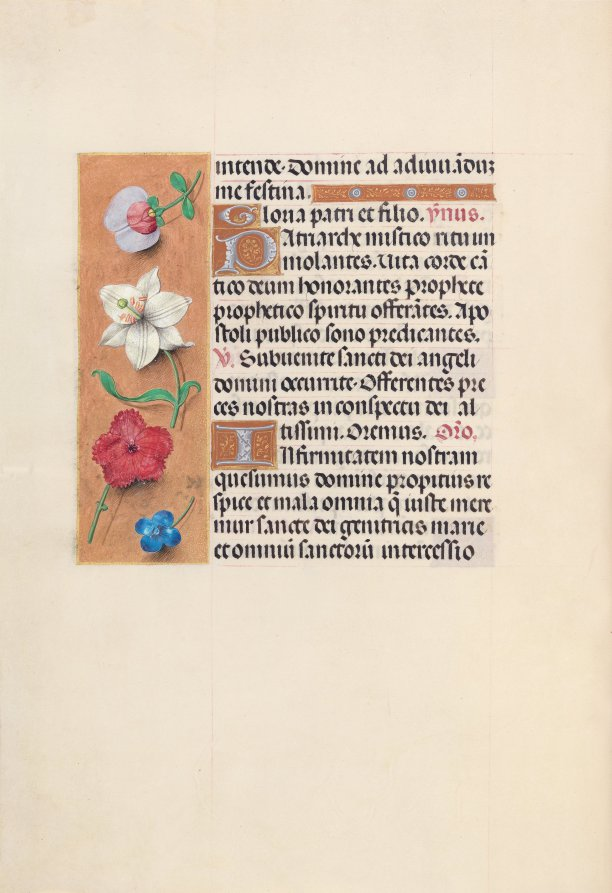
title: Hours of Queen Isabella the Catholic, Queen of Spain: Fol. 39v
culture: Flanders, Ghent and Bruges, late 15th century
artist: Master of the First Prayerbook of Maximillian (Flemish, c. 1444–1519)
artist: and Associates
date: c. 1500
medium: ink, tempera, and gold on vellum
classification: Bound Volume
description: This manuscript was illuminated by a circle of at least five highly organized manuscript painters active in the Flemish cities of Ghent and Bruges. The principal illuminator was Alexander Bening, who painted the majority of the book's miniatures. Manuscripts produced by this circle of artists are renowned for the decoration of their borders, which typically feature a rich variety of realistically-painted flowers, birds, and butterflies. This prayer book, called a book of hours, was intended not for a cleric, but for the private devotions of a lay person-in this case, Isabella the Catholic, Queen of Spain (1451-1504). Isabella's coat of arms embellishes the book's frontispiece. It is unlikely that the book was commissioned by the Queen herself; rather, she probably received it as a diplomatic gift from someone courting her patronage, perhaps Cardinal Francisco Jimenez de Cisneros. A Franciscan friar, Jimenez was dependent upon Isabella for his advancement, first to the post of Queen's confessor in 1492, and then to Archbishop of Toledo in 1495.